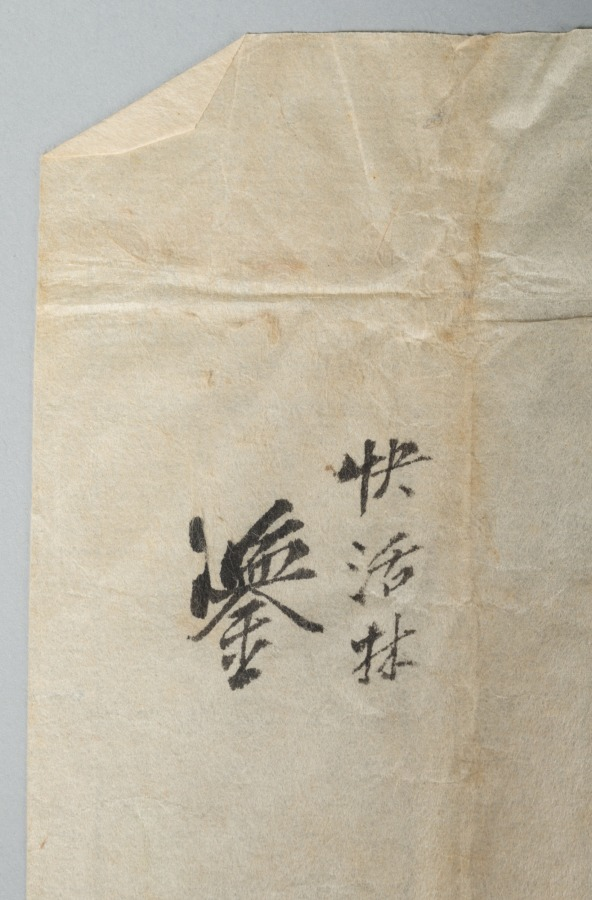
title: Happy Forest, from Water Margin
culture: Japan, Edo period (1615–1868)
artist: Matsumura Goshun (Japanese, 1752–1811)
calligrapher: and Amenomori Shōteki (Japanese, 1731–1786)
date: late 1700s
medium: hanging scroll; ink and color on paper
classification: Painting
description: The Chinese literary classic Water Margin is set in the 1120s and tells the story of 108 outlaws who first rebel against the government and then join forces with it. This painting depicts an episode in which hero Wu Song reclaims the tavern Happy Forest for its rightful owner, the prison warden’s son, Shi En. To prepare for the fight, Wu Song drinks a lot of wine. The painting was inscribed with a quote in which an ally describes Wu Song’s fighting style. It reads as follows: Where his twin fists rise, clouds and thunder roar, When his flying kick comes, wind and rain tremble.